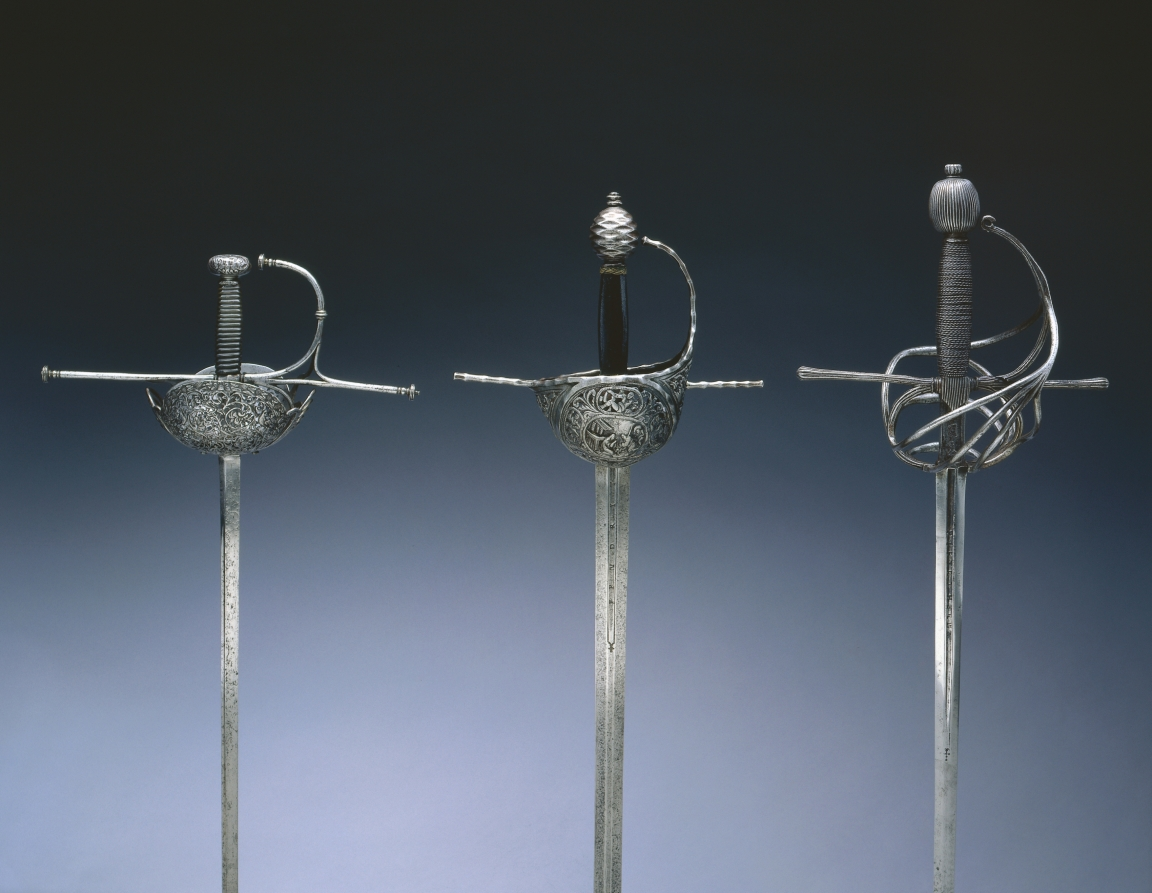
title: Rapier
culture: Spain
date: c. 1650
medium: steel, pierced and chiseled, leather and wood grip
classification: Arms and Armor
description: The rapier was a sword worn with civilian dress and used in duels. The term rapier derives from a 16th-century French word rapière, which in turn derived from the Spanish espada ropera, or “dress sword.” The rapier was a light weapon with a straight double-edged and pointed blade that, with the development of the art of fencing in the 1500s and 1600s, gradually became narrower and lighter, and thus suitable for thrusts only. With the new technique of swordplay emphasizing the point of the blade, sword guards became more complex to protect the duelist’s unarmored hand. These elaborate guards were frequently decorated by various techniques—chiseling, bluing, russeting, and damascening.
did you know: Many civilians wore swords for self defense and for settling disputes by dueling; the swords often reflected contemporary taste and fashion.